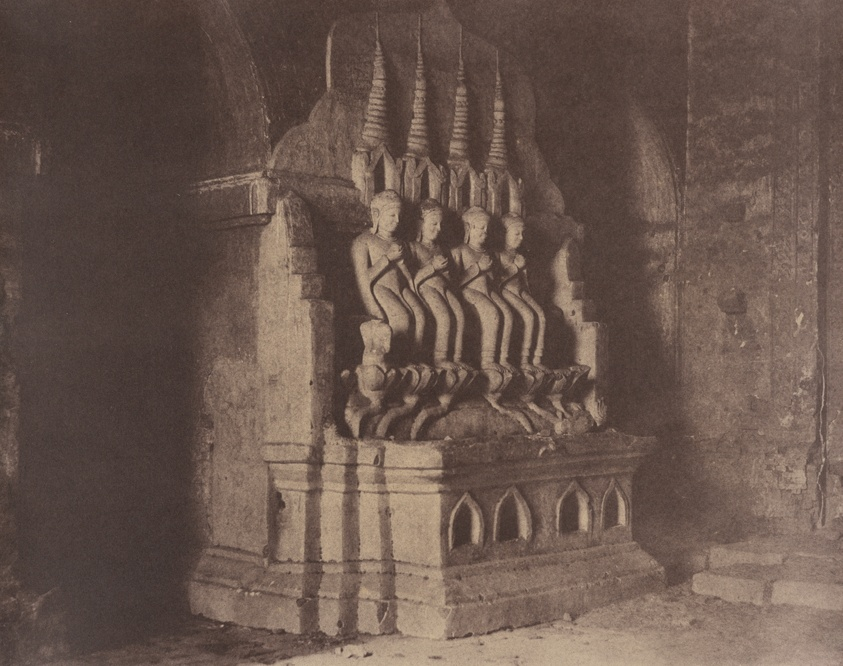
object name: Photograph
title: No. 23. Pugahm Myo [Pagan]. Figures in Damayangyee Pagoda [Dhamma-yan-gyi].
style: 19th century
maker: Linnaeus Tripe (English, 1822–1902)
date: 1855, printed 1856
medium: Salted paper print, from the album "Burma Views" (1857)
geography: England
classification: photograph; photography